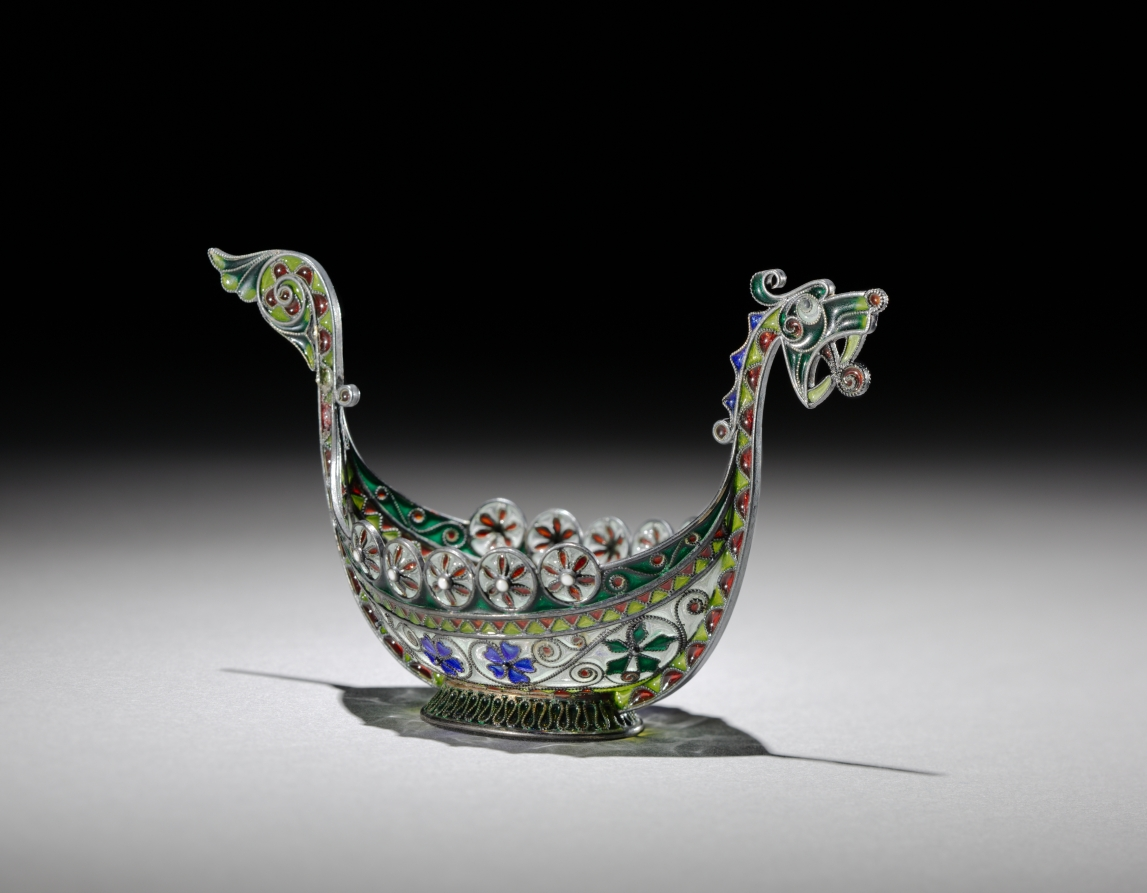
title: Salt Cellar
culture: Norway, Bergen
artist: Marius Hammer (Norwegian, 1847–1927)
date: c.1890–1900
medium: gilt silver, enamel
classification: Enamel